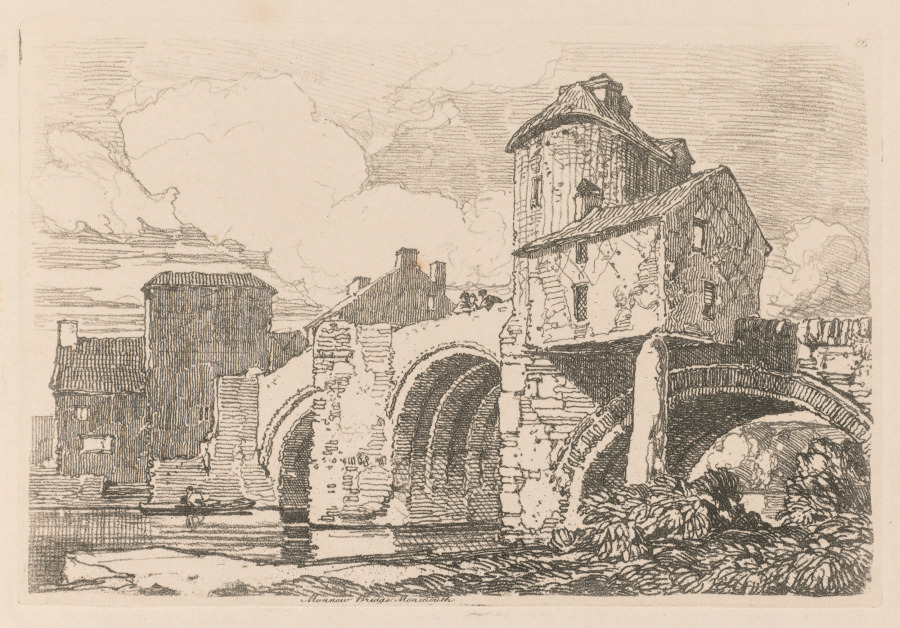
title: Liber Studiorum: Plate 26, Monnow Bridge, Monmouthshire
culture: England, 19th century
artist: John Sell Cotman (British, 1782–1842)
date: 1838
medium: softground etching, from a bound volume containing 48 plates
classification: Bound Volume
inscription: In plate, within image, upper right: 26; in plate, below image: Monnow Bridge, Monmouthshire